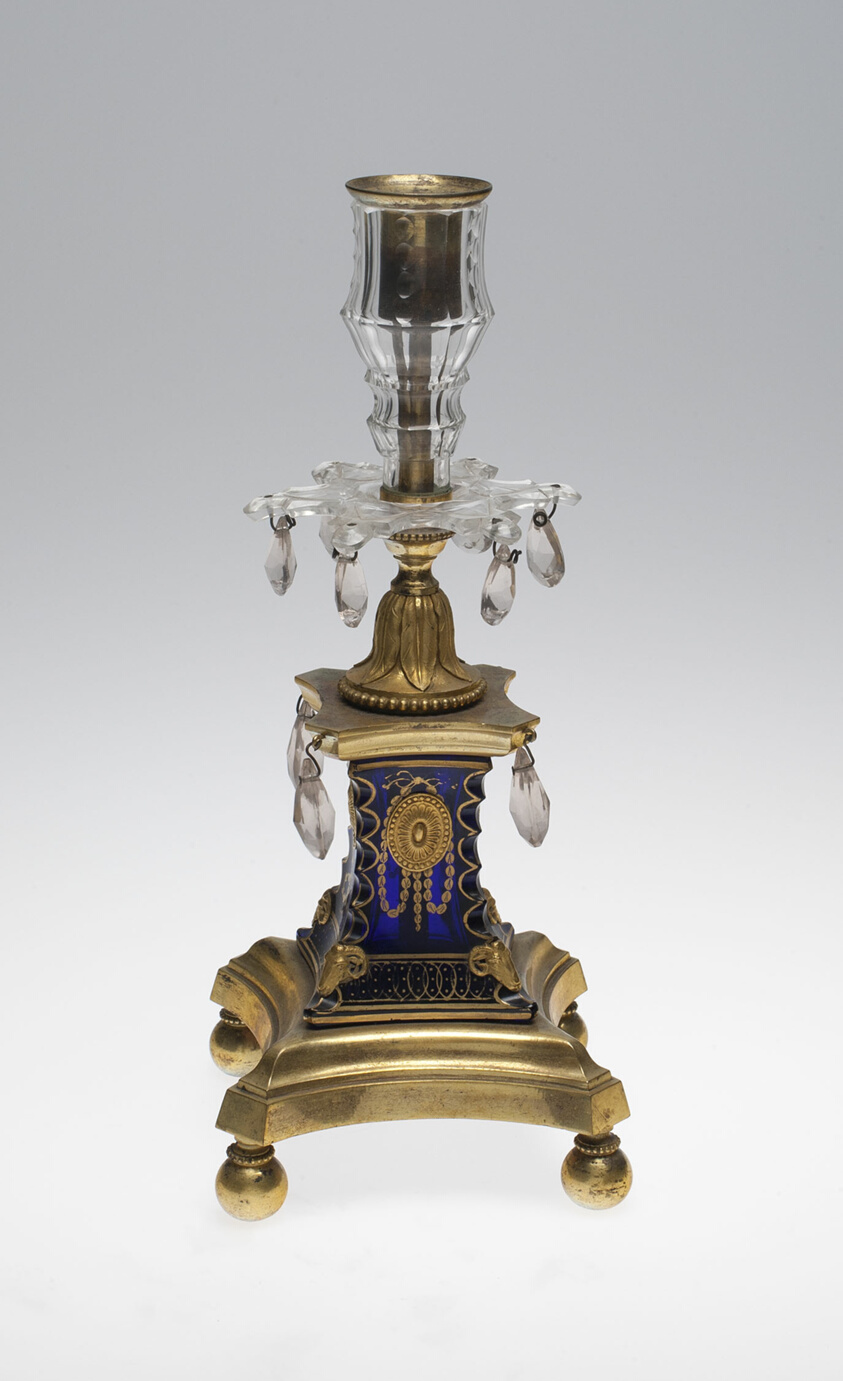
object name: Glass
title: Candelabra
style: Neoclassicism, european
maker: England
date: 1780/1800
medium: Clear and blue glass, gilding and brass mounts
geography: England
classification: candleholder - candlestick; candleholder; bronze; metalwork; european decorative arts; glass